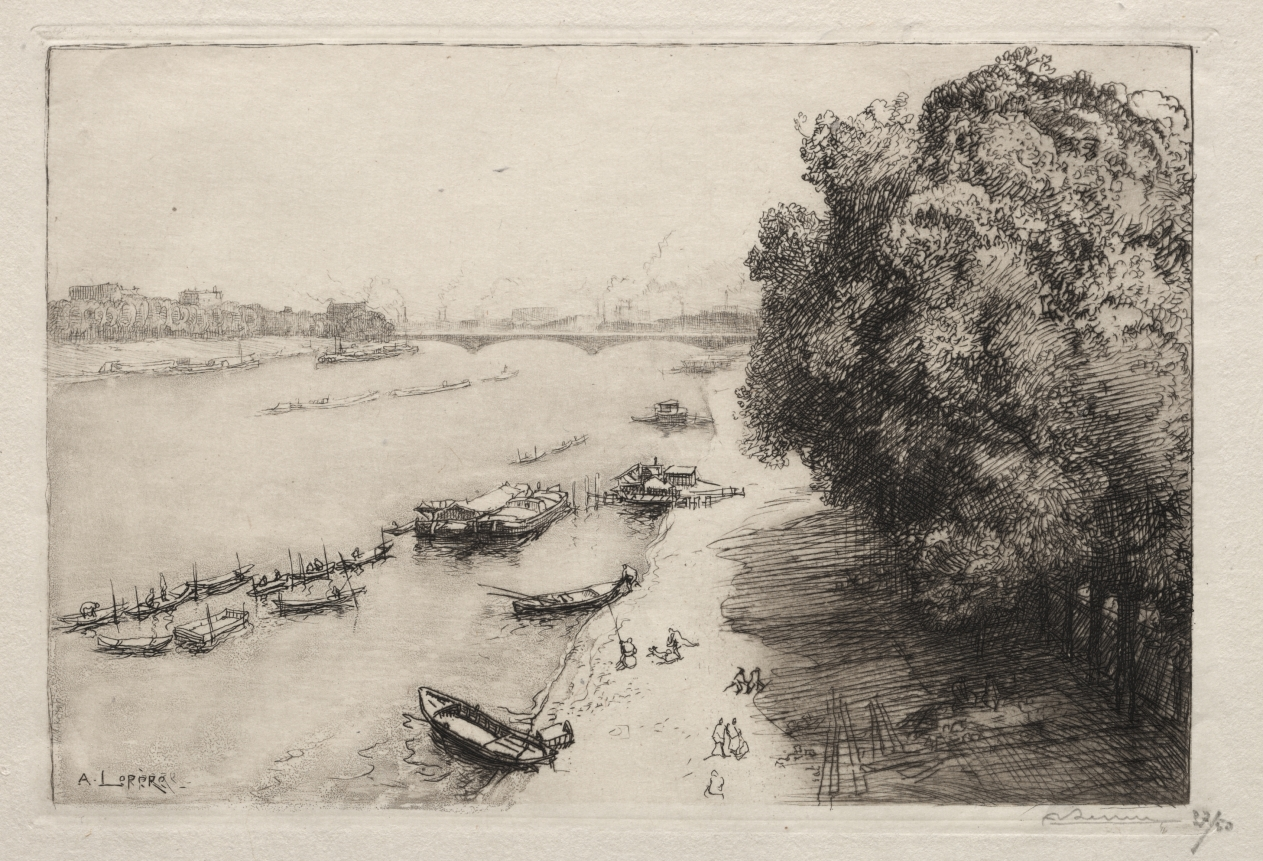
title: La Seine au Pont Nationale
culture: France, 20th century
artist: Auguste Louis Lepère (French, 1849–1918)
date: 1914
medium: etching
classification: Print